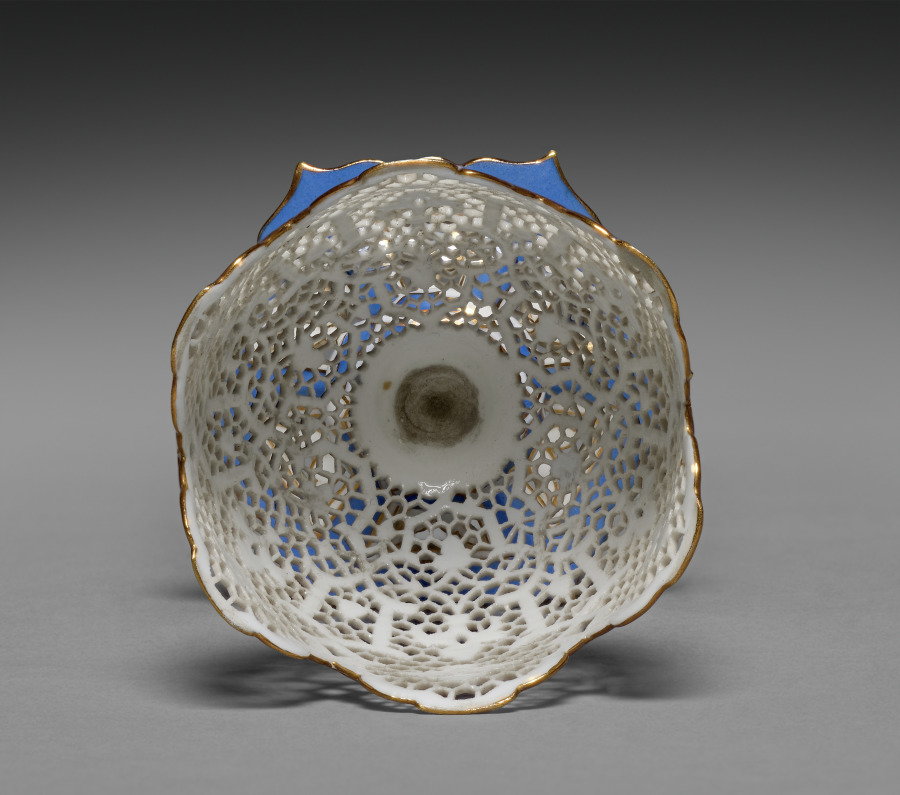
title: Cupholder (Zarf)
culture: France, Sèvres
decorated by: Guyonnet (French)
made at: Sèvres Porcelain Factory (French, est. 1756)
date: c. 1848–55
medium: hard-paste porcelain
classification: Ceramic